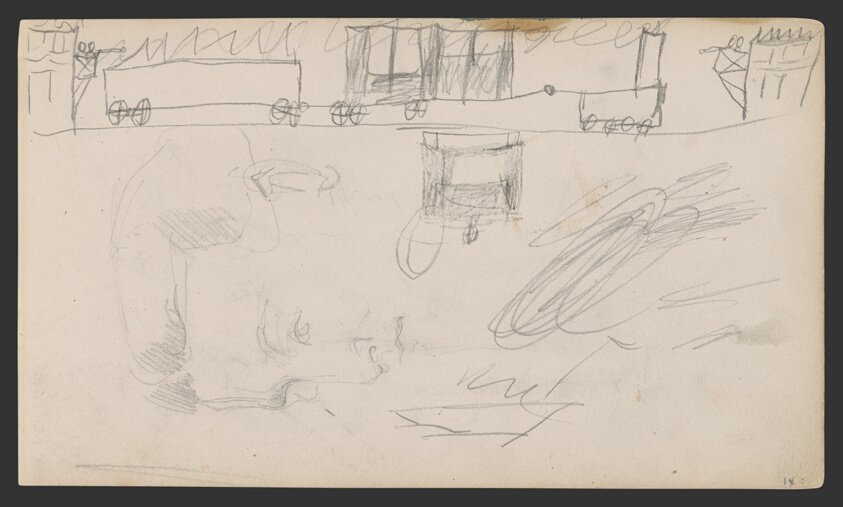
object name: Drawing and Watercolor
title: Sketchbook No. 2 (L'Estaque)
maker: Paul Cézanne; French, 1839-1906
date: 1875–86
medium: Graphite and pen and ink drawings on paper, bound into a book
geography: France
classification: sketchbook; graphite; prints and drawing; paper